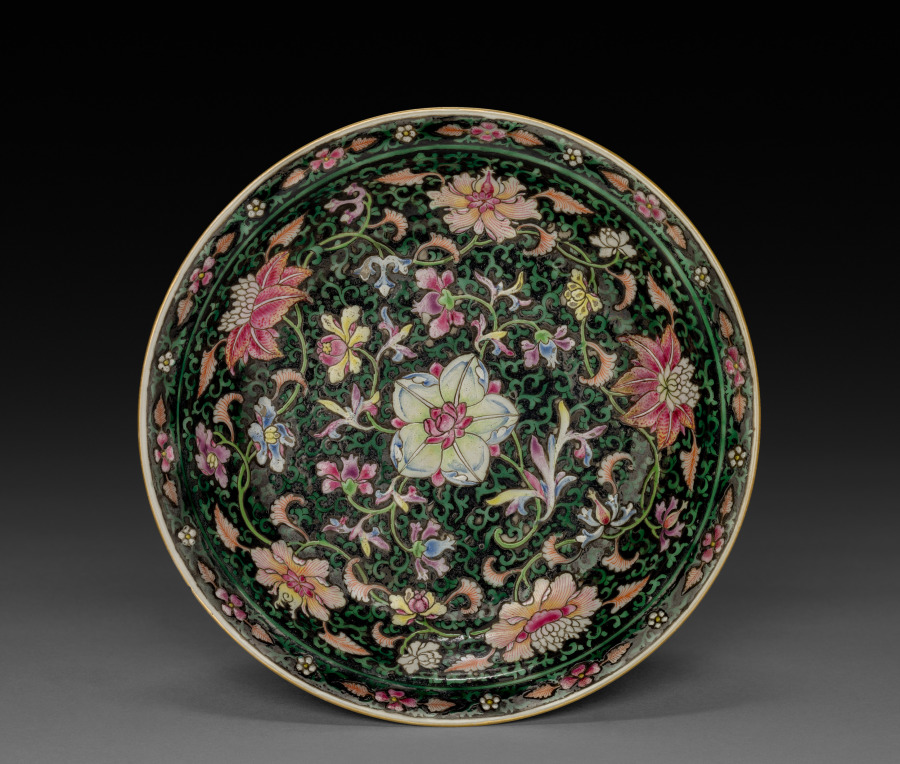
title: Dish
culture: China, Qing dynasty (1644–1911), Qianlong reign (1736–95)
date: 1736–95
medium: porcelain with famille rose overglaze enamel decoration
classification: Ceramic